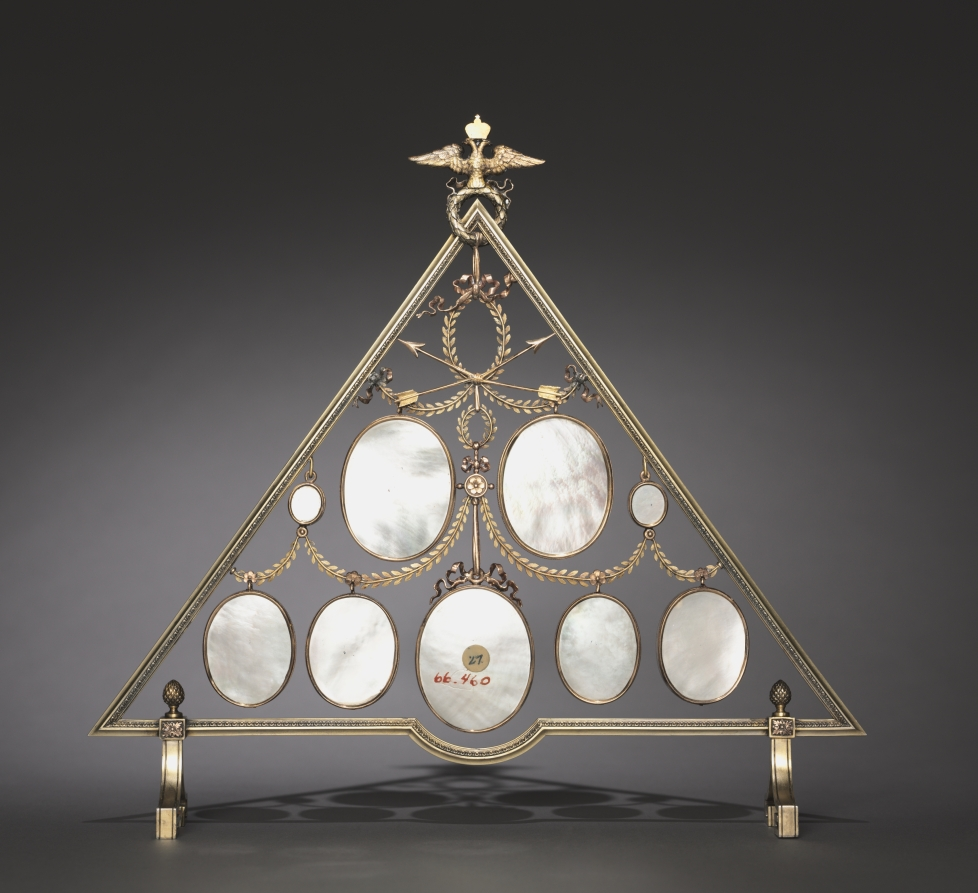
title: Framed Miniatures of the Russian Imperial Family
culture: Russia, St. Petersburg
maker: House of Fabergé (Russian, 1842–1918)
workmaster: Johan Viktor Aarne (Finnish, 1863–1934)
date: c. 1896–1905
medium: watercolor on ivory in a gold and silver gilt frame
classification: Miscellaneous